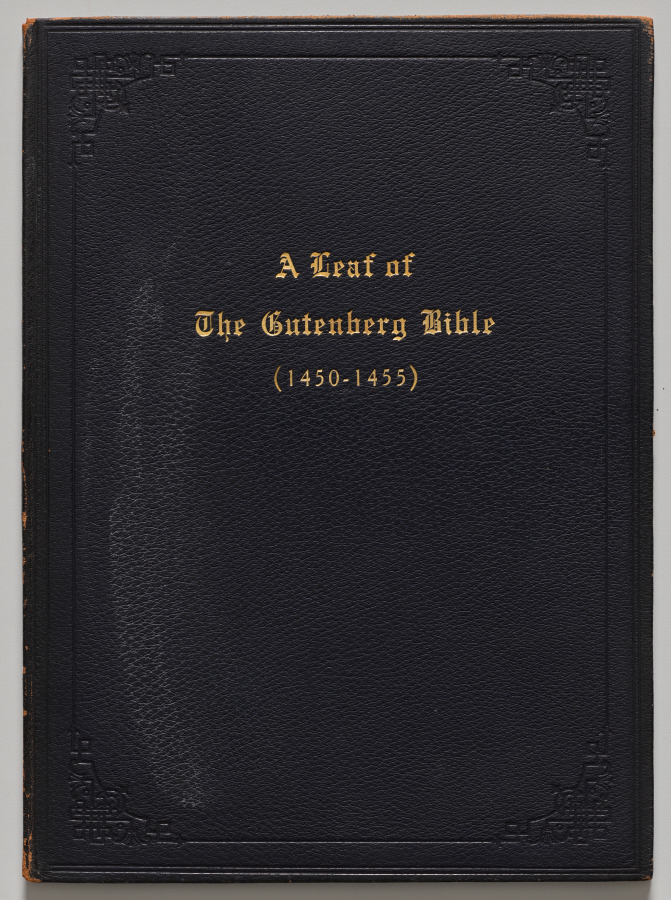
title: Page from a Gutenberg Bible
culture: Germany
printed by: Johann Gutenberg (German, c. 1397–1468)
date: c. 1450–1455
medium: printed page with hand-applied initials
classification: Bound Volume